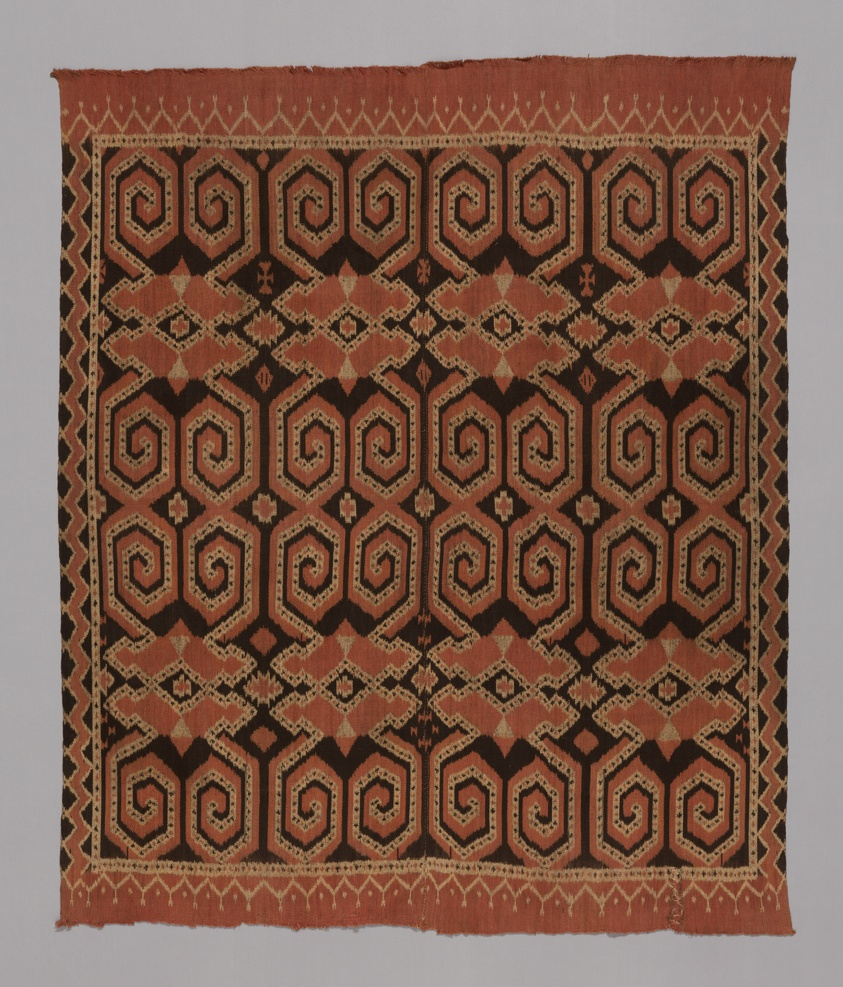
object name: Religious/Ritual Object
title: Ceremonial Hanging/Shroud (Porisitutu)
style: indonesian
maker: Toraja; Indonesia, Sulawesi, Kalumpang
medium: Two panels joined; cotton, warp resist dyed (warp ikat) plain weave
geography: Indonesia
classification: textile; weaving - printed; ritual objects